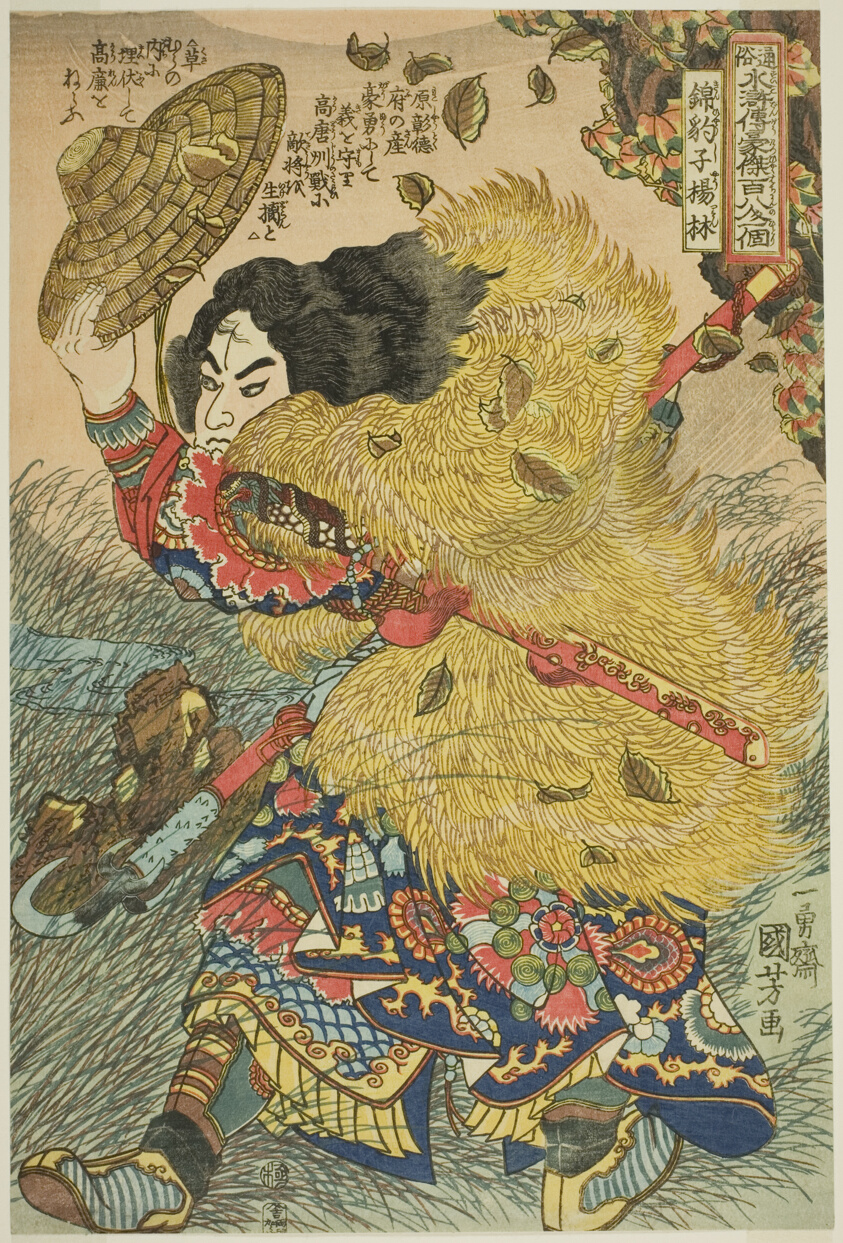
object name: Print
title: Yang Lin (Kinhyoshi Yorin), from the series "One Hundred and Eight Heroes of the Popular Water Margin (Tsuzoku Suikoden goketsu hyakuhachinin no hitori)"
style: Japanese (culture or style)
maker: Utagawa Kuniyoshi (Japanese, 1797-1861)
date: c. 1827/30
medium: Color woodblock print; oban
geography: Japan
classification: woodblock print; print; asian art